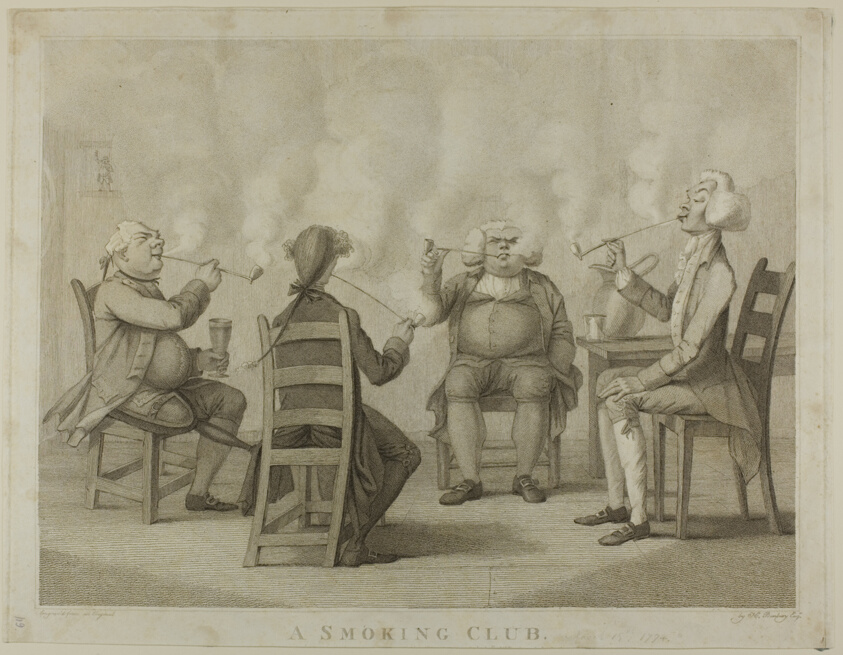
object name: Print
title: A Smoking Club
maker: Unknown Artist; after Henry William Bunbury (English, 1750-1811)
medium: Engraving with stipple on paper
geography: England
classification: etching; print; prints and drawing